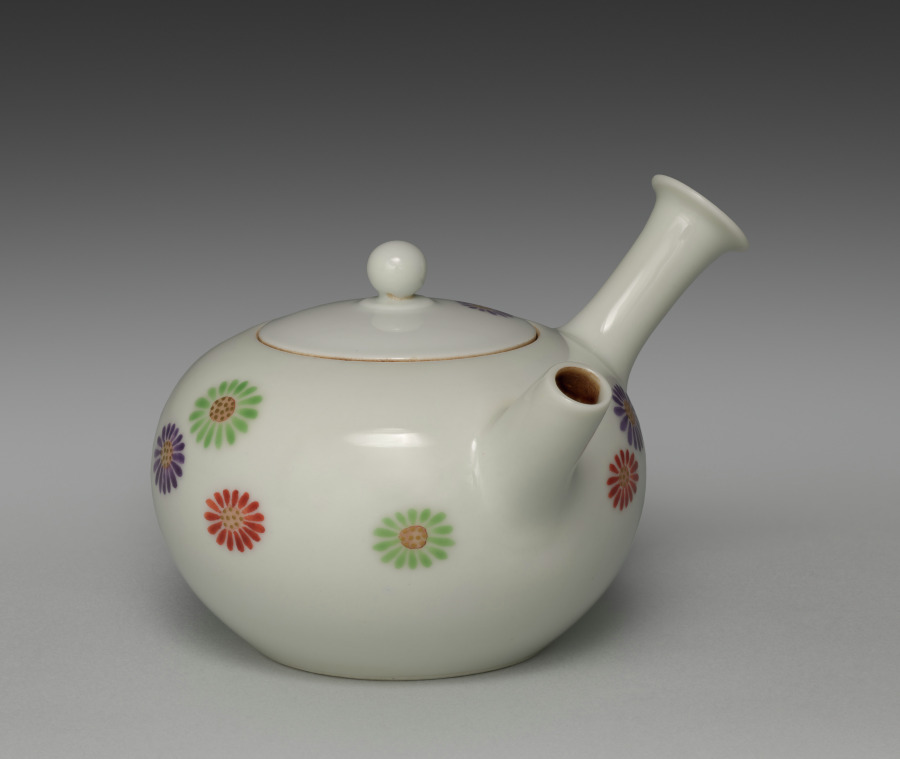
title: Teapot with Chrysanthemum Motifs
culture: Japan, Meiji period (1868–1912)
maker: Seifū Yohei III (Japanese, 1851–1914)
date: 1912–14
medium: Porcelain with overglaze color enamel and gold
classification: Ceramic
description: This side-handled sencha teapot has the lid flush against the body, forming an oblong orb. It is decorated with a sprinkling of similar chrysanthemum motifs in red, green, and purple overglaze color enamels with centers of pale red dotted with gold.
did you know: This teapot with chrysanthemum motifs shows off Seifū Yohei III’s technique of enamels painted over the glaze.